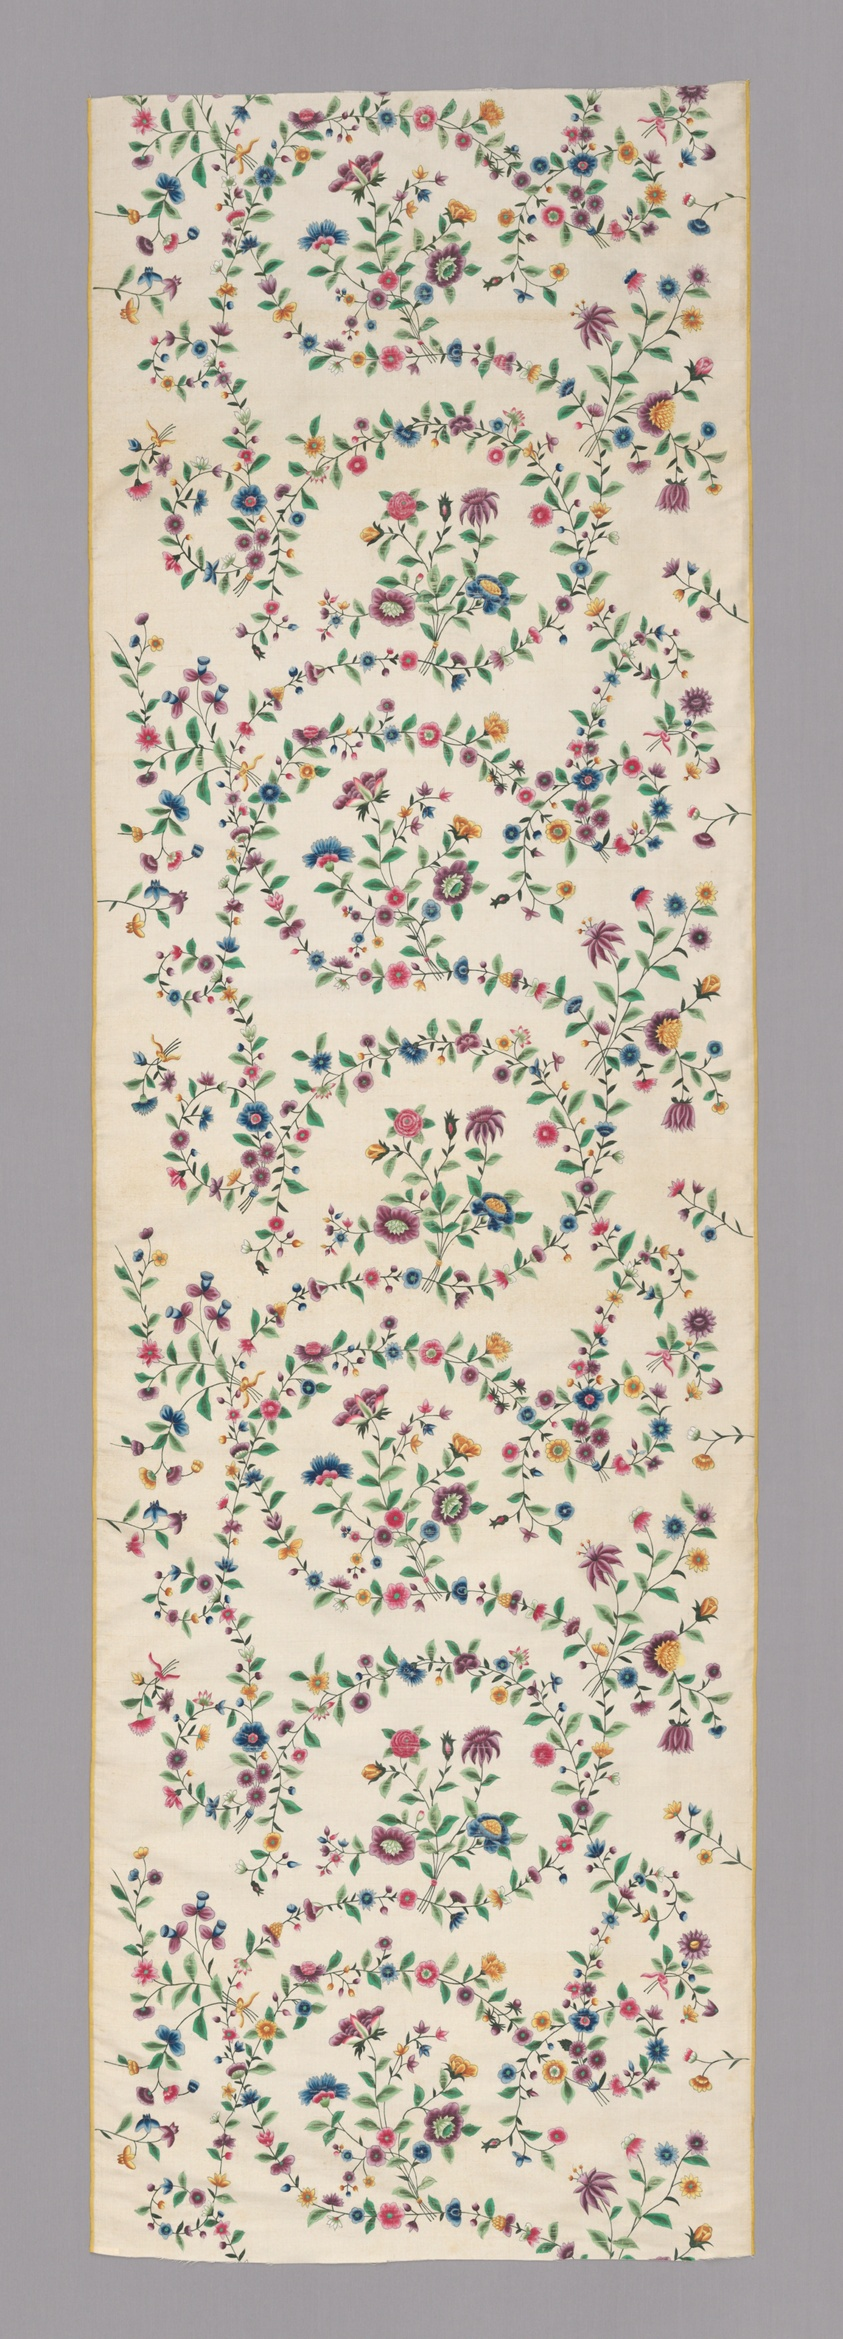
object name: Textile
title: Painted Silk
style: qing, 18th Century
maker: Made in China for the European or American market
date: Qing dynasty (1644–1911), 1750–75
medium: Silk, plain weave; painted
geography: China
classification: weaving; textile; garment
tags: botanical/floral, floral, floral motifs, flowers, foliage, vines